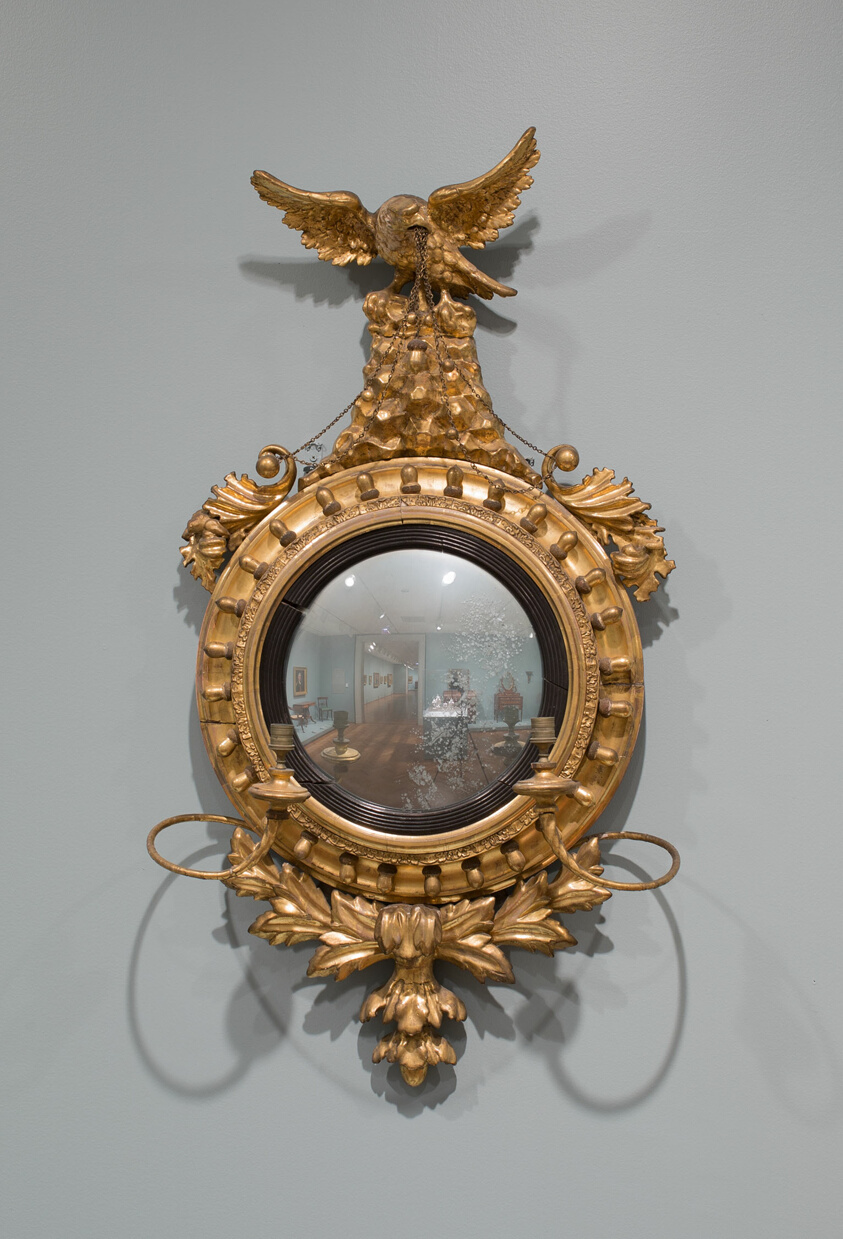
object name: Decorative Arts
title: Pair of Convex Mirrors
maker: Artist unknown (American or English, 19th century)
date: 1810–30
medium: Gilt eastern white pine, red pine, and mirrored glass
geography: United States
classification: furniture accessory; american decorative arts; american arts; decorative arts